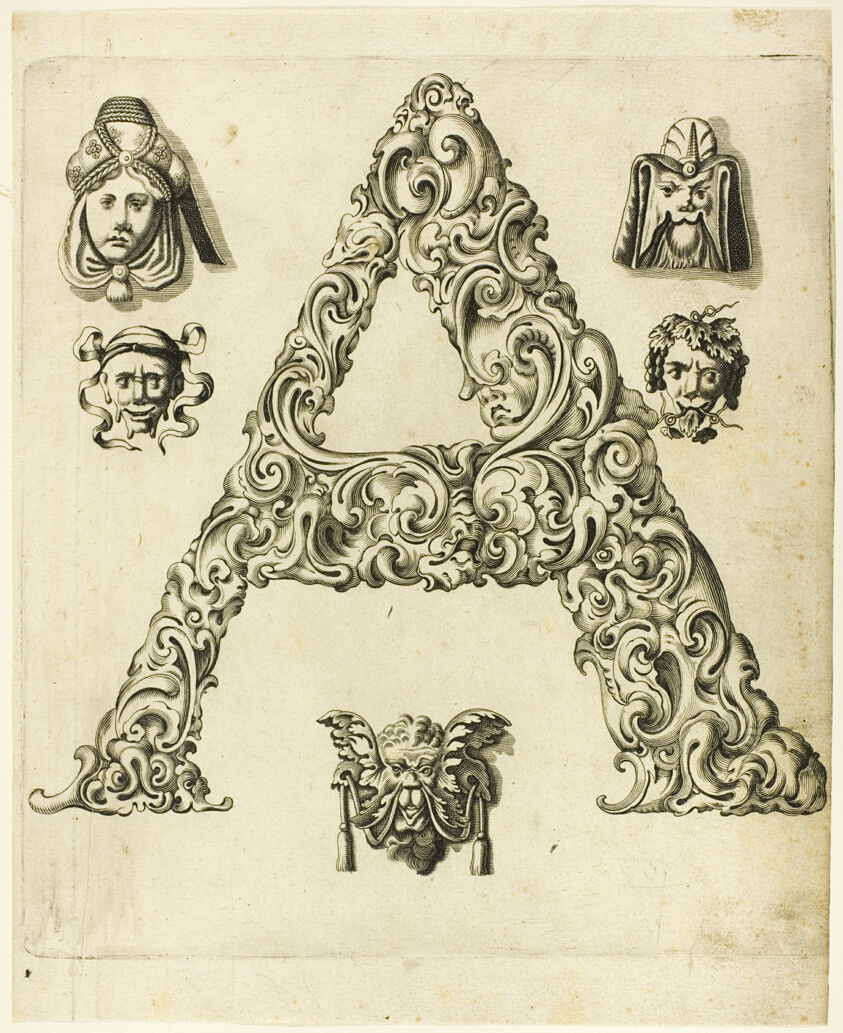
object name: Print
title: Letter A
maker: Peter Aubry (German, 1596-1668)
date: 1630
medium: Engraving on paper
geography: Germany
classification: engraving; print; prints and drawing